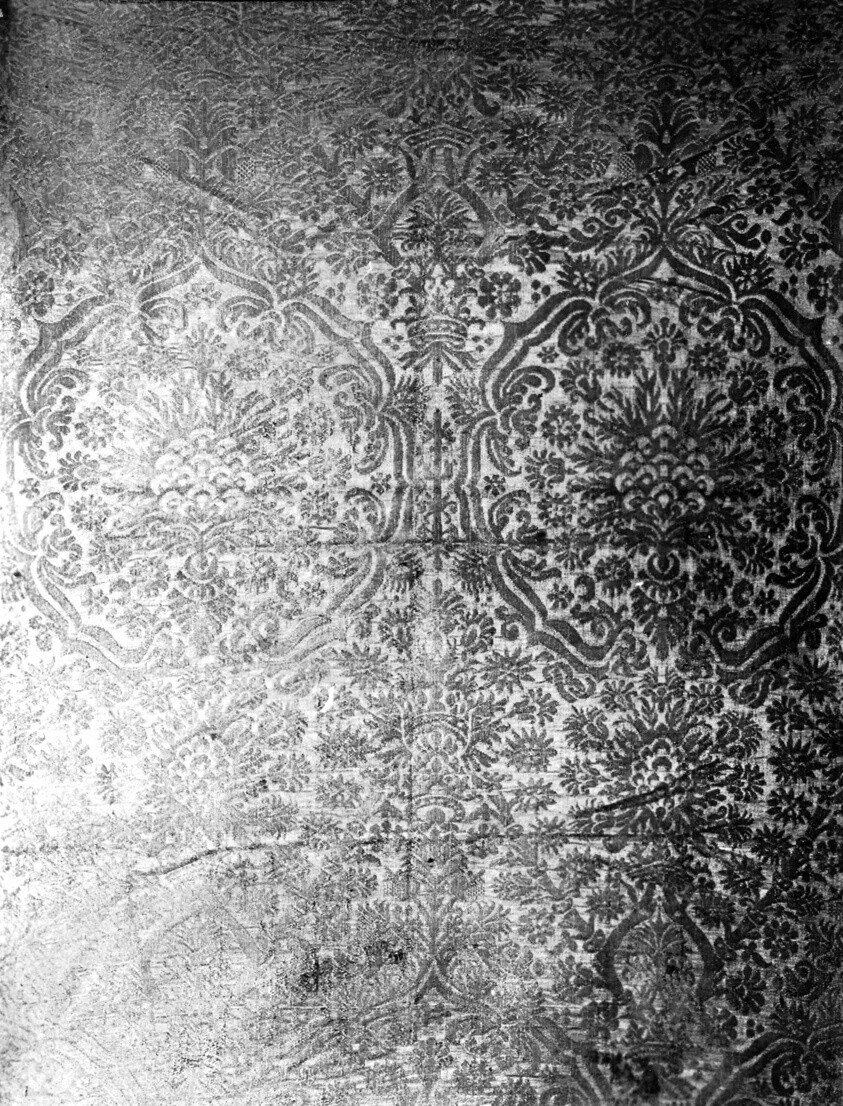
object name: Textile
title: Fragment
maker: Italy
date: Late 15th century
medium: Simple satin damask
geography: Italy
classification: textile; weaving